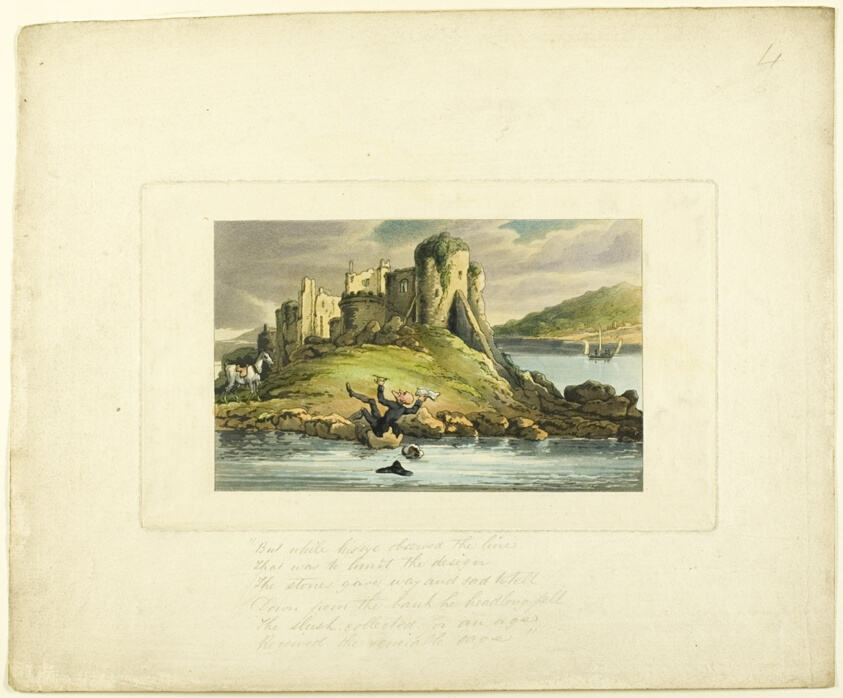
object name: Print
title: Doctor Syntax Tumbling in the Water, from The Tour of Doctor Syntax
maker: Thomas Rowlandson (English, 1756-1827); published by Rudolph Ackermann (English, 1764-1834)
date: c. 1812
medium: Hand-colored etching and acquaint on ivory wove paper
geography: England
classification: etching; print; prints and drawing